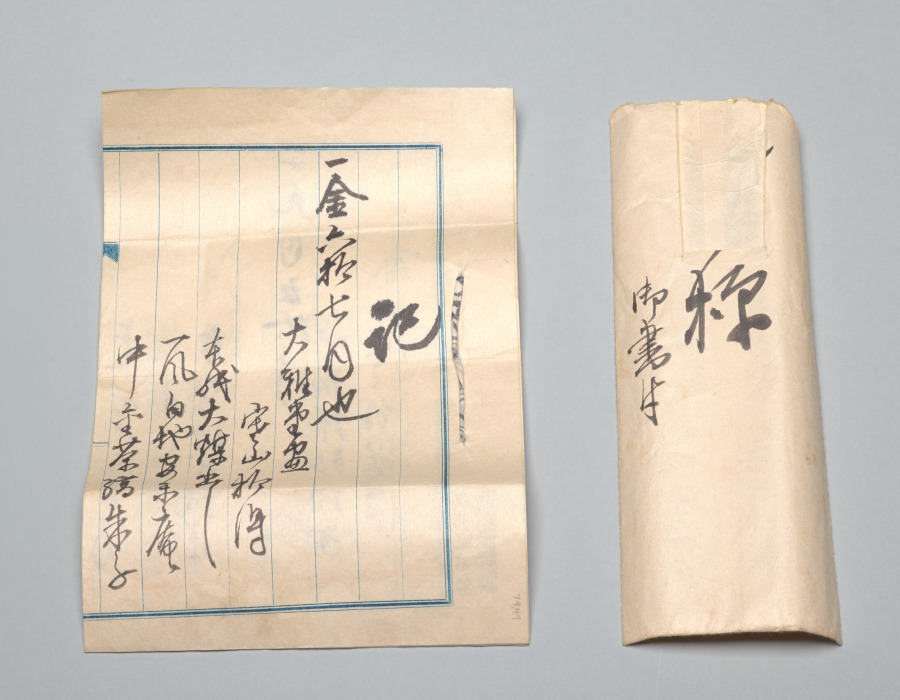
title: Hanshan and Shide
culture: Japan, Edo period (1615–1868)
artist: Ike Taiga (Japanese, 1723–1776)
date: c. 1745–76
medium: hanging scroll; ink and light color on paper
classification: Painting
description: Hanshan and Shide are a pair of individuals associated with Chan, or Zen, Buddhism who lived on Mount Tiantai in China around the 700s to early 800s. In Japan, their names are read Kanzan and Jittoku. Hanshan, whose name means “Cold Mountain,” was a monk-poet, shown reading out from a scroll of his poetry in this work. His close friend Shide, or “Foundling,” was a temple’s custodian. Here, Shide listens intently to Hanshan’s verses, his brush broom behind him.